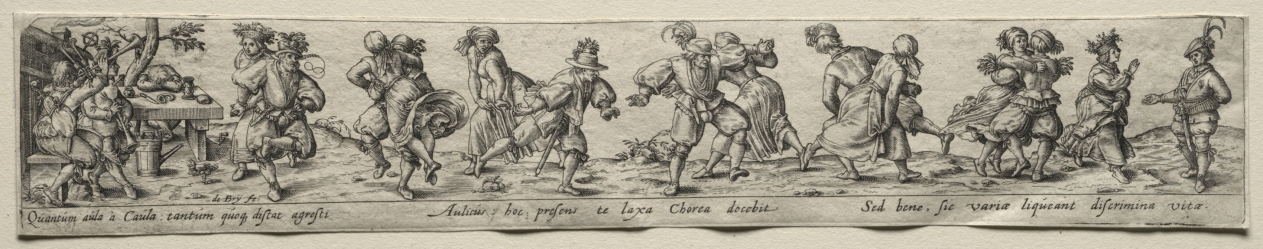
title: Dancing Peasants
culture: Flanders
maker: Johann Theodor de Bry (German, 1561–1623)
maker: after Hans Sebald Beham (German, 1500–1550)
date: 1580–1600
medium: engraving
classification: Print